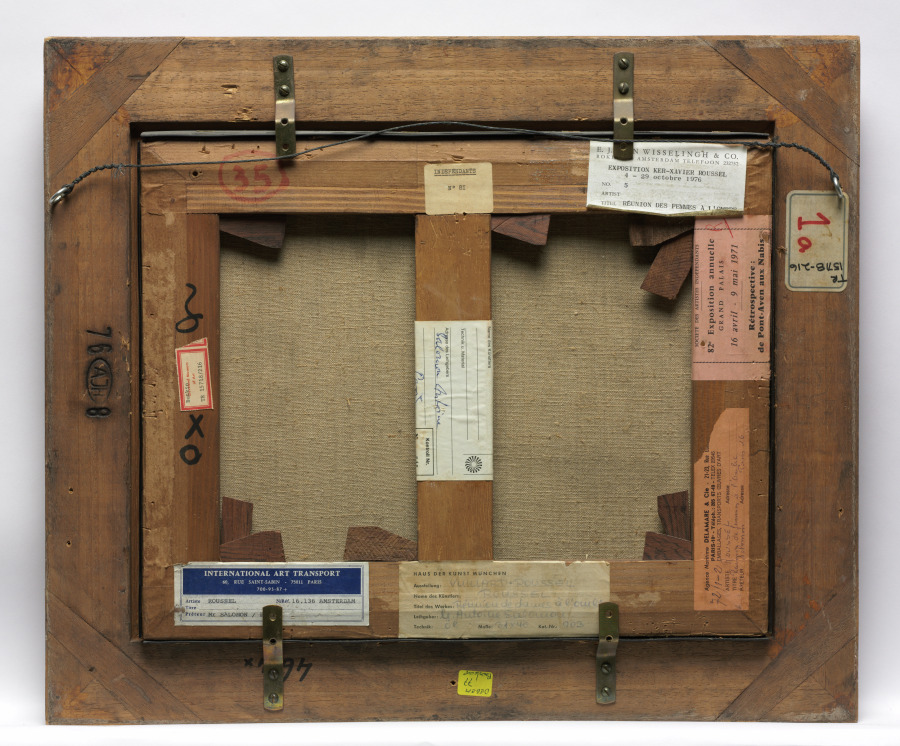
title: Women Meeting in the Shade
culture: France, 19th century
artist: Ker Xavier Roussel (French, 1867–1944)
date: c. 1890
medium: oil on canvas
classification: Painting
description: Roussel was a founding member of the French avant-garde group known as the Nabis (prophets) and the brother-in-law of fellow member Édouard Vuillard. Roussel shared their fascination with Japanese prints and developed a style of radically simplified forms and strong, decorative color. His intimate views of daily life convey a mood of quiet feeling rather than focusing on narrative, storytelling content. This painting depicts a group of figures, presumably two women and four children, meeting in the shade of tall trees, while other figures walk along the grassy riverbank.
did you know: Known mostly for his small Nabis paintings of the 1890s, Roussel also produced large murals for the Théâtre des Champs-Élysées and the Palais de Chaillot in Paris, and the Palais des Nations in Geneva.